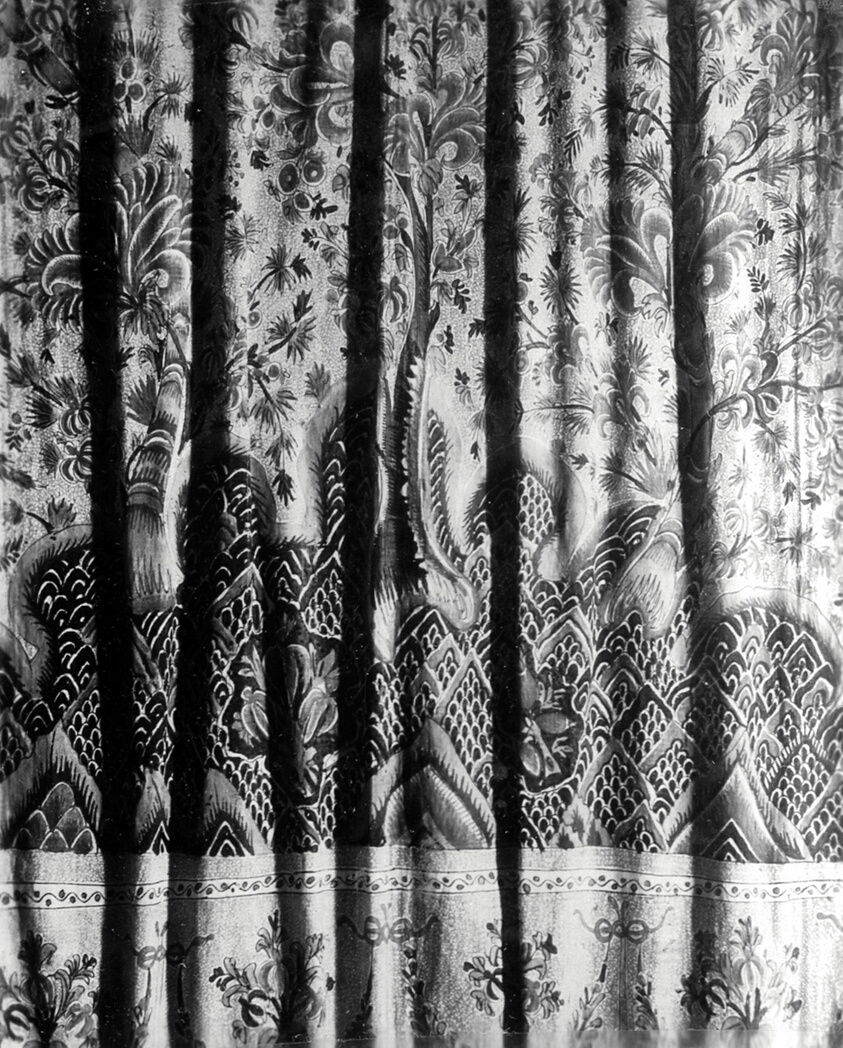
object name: Textile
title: Panel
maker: India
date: 17th/18th century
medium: Cotton, plain weave; printed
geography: India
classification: textile; weaving - printed